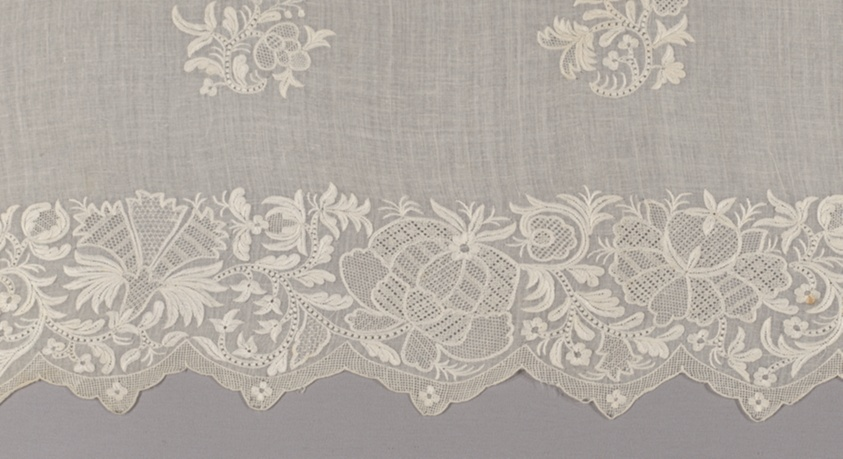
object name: Costume and Accessories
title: Apron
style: 18th Century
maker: England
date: 1760s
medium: Cotton, plain weave; drawnwork and embroidery in cotton, satin, buttonhole, chain, and double chain stitches with linen thread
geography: England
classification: textile; costume accessory; needlework (visual works); costume; dress (garment); clothing; apron (main garment); costume - embroidery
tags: flowers, floral patterns, floral, floral motifs